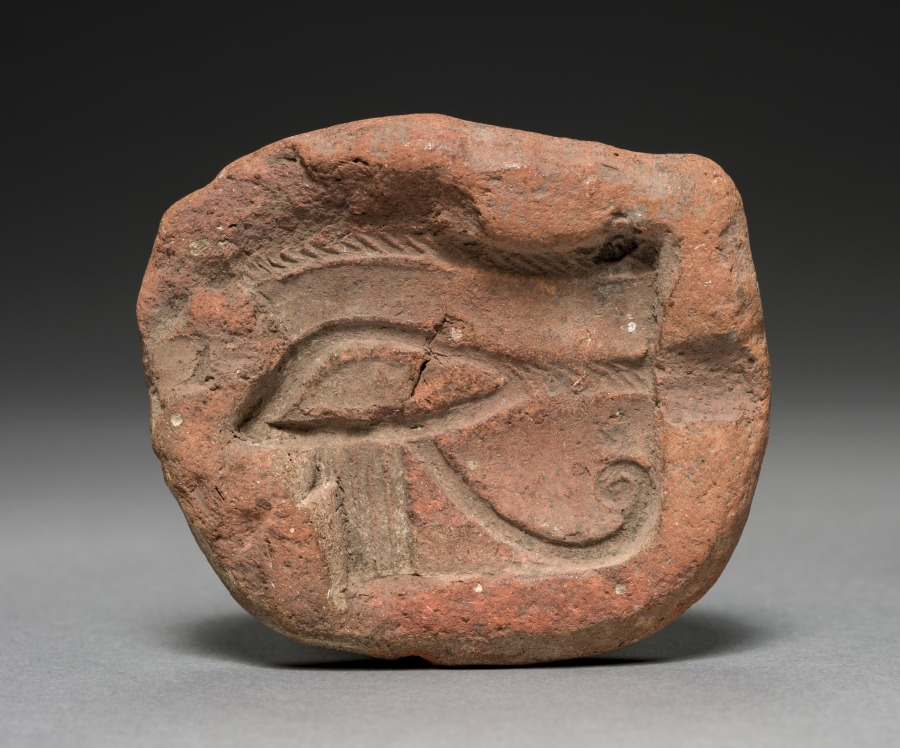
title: Faience Mold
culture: Egypt, Late period (715–332 BCE)(?)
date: 545–332 BCE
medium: terracotta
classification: Ceramic